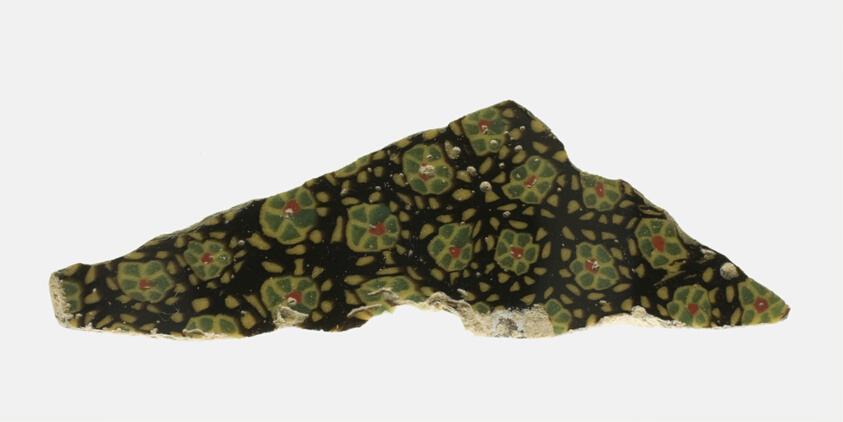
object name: Decorative Arts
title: Fragment of a Revetment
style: roman (ancient, style or period), ancient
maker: Roman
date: 1st century BCE–1st century CE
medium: Glass, mosaic glass technique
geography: Roman Empire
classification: fragment; decorative arts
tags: decoration